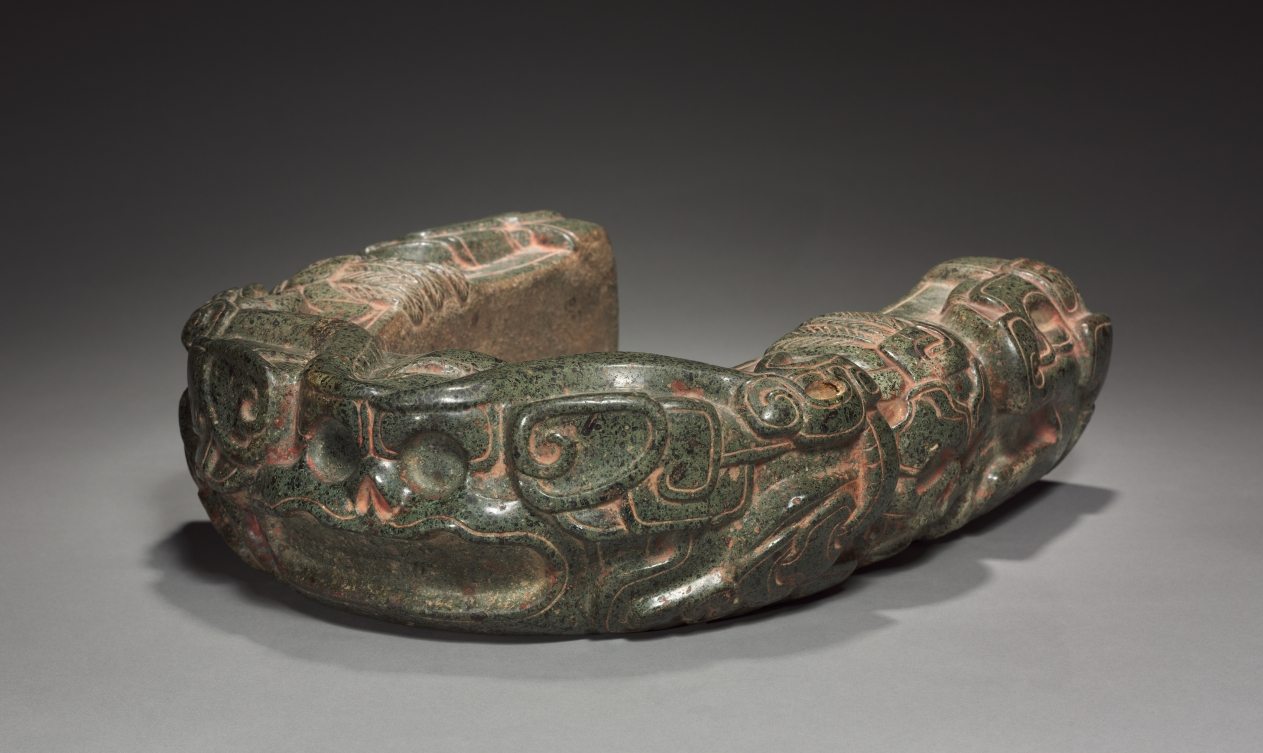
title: Ballgame Hip Protector (Yoke)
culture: Mexico, Gulf Coast, Classic Veracruz style (600-1100)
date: 600–900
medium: greenstone, pigment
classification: Sculpture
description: U-shaped ballgame sculptures imitate the shape of belt-like protectors, perhaps made of wood and padding, worn to shield ballplayers from injury when they returned the solid rubber ball from their hips. This fine example embodies a major theme of the ballgame: the connection between fertility and death. It is made of greenstone, a precious material that through its color symbolizes the lush burgeoning of nature after the rainy season. The imagery, however, is menacing: a monstrous head snarls from the curve, and human skulls appear on the sides.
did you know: The ballgame was a team sport played on specially constructed rectangular courts and involved striking a large solid rubber ball without using your hands.